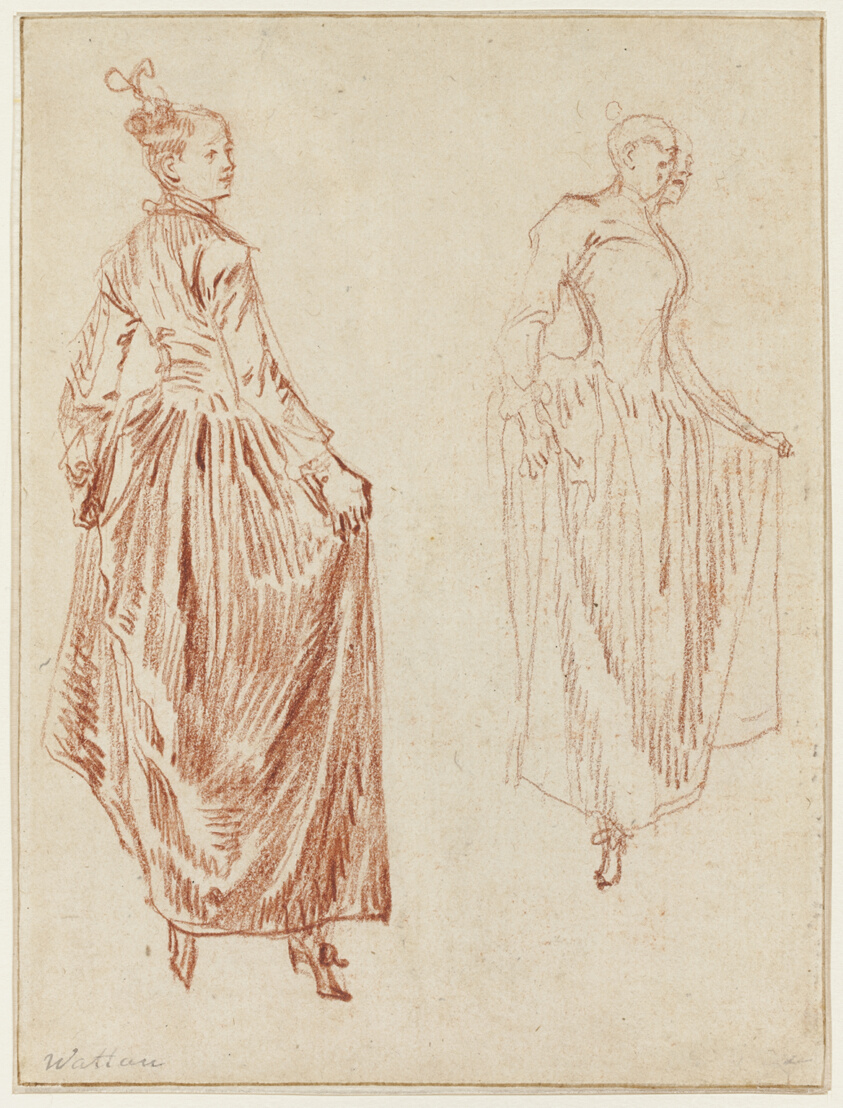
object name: Drawing and Watercolor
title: Two Studies of a Dancer, Raising Her Skirt in Her Two Hands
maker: Jean Antoine Watteau (French, 1684-1721)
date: 1712/13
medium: Red chalk on cream laid paper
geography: France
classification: chalk; drawings (visual works); prints and drawing